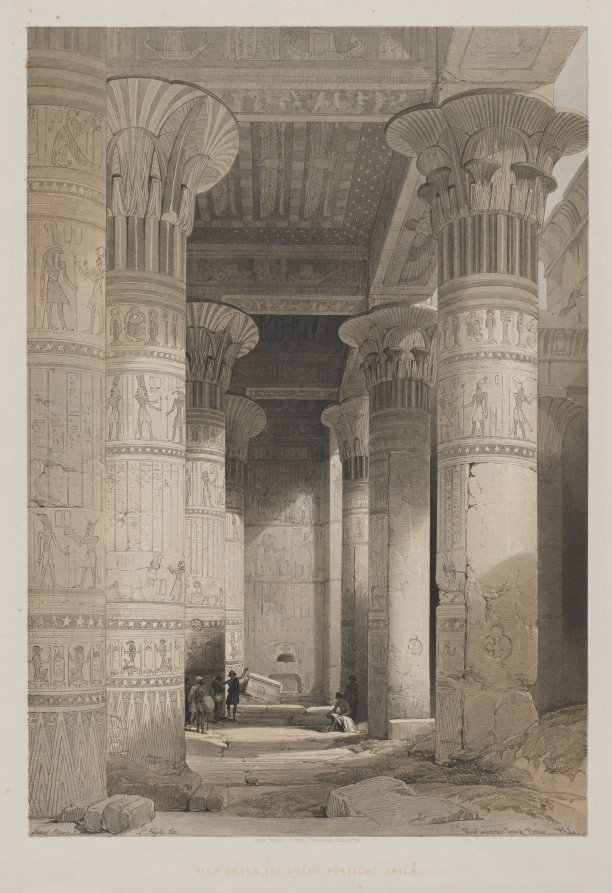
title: Egypt and Nubia, Volume I: View Under the Grand Portico of the Temple, Philae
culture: England, 19th century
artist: Louis Haghe (British, 1806–1885)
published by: F. G. Moon, 20 Threadneedle Street, London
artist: after David Roberts (Scottish, 1796–1864)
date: 1846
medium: color lithograph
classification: Print